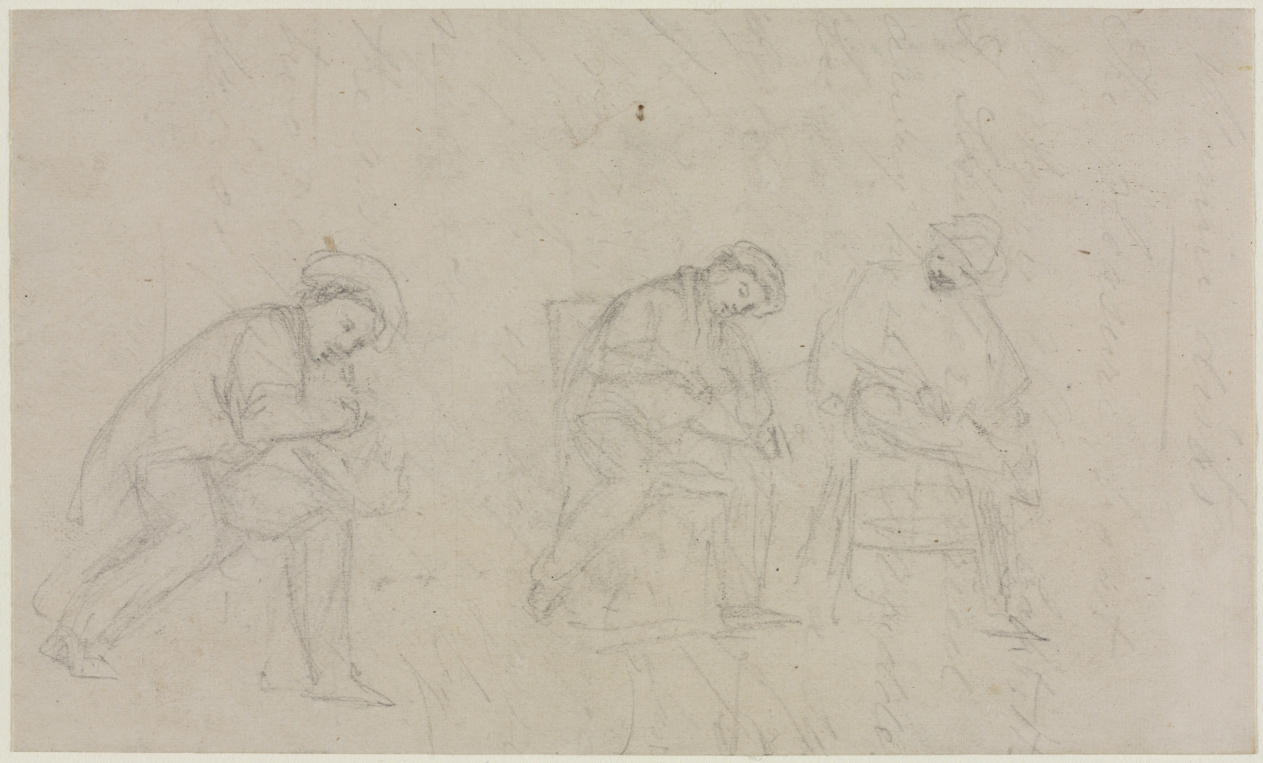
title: Tuning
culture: America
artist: William Sidney Mount (American, 1807–1868)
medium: graphite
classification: Drawing